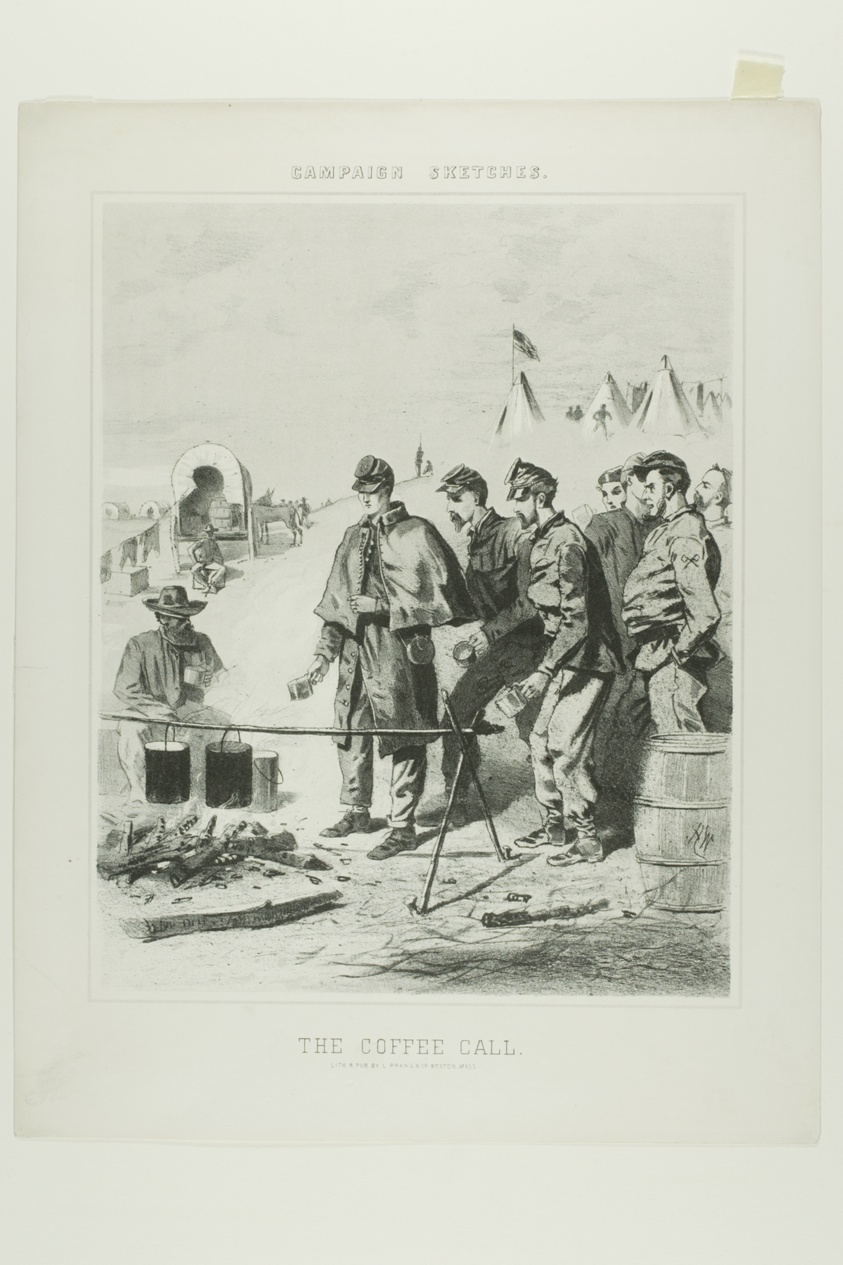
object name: Print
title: Campaign Sketches: Coffee Call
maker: Winslow Homer (American, 1836–1910)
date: 1863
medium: Tint lithograph on heavy ivory wove paper, folded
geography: United States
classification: lithograph; print; prints and drawing